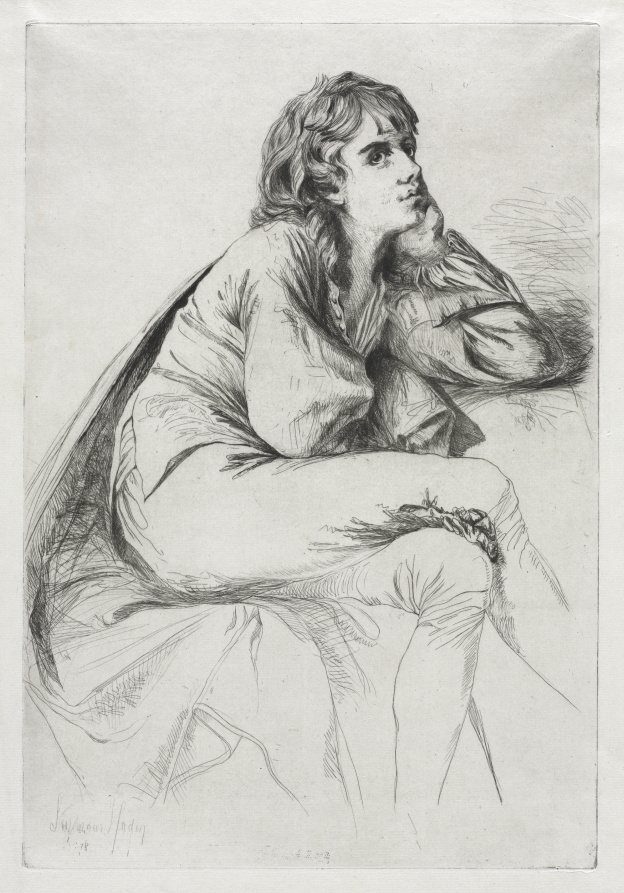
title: Thomas Haden of Derby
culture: England, 19th century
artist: Francis Seymour Haden (British, 1818–1910)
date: 1864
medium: etching and drypoint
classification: Print